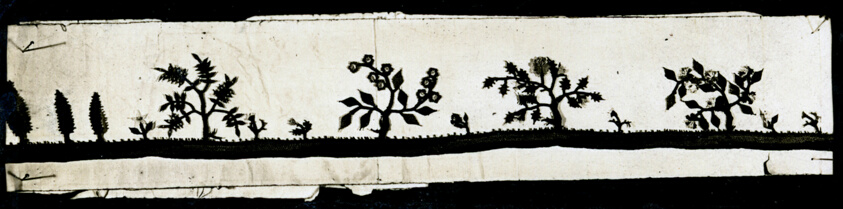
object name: Textile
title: Border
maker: Eastern Mediterranean or Turkey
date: 1825/75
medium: Silk, needle lace; embroidered in back, four-sided open work, running, and satin stitches; French knots; mounted to cotton fiber paper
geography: Mediterranean Region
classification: textile; lace - needle